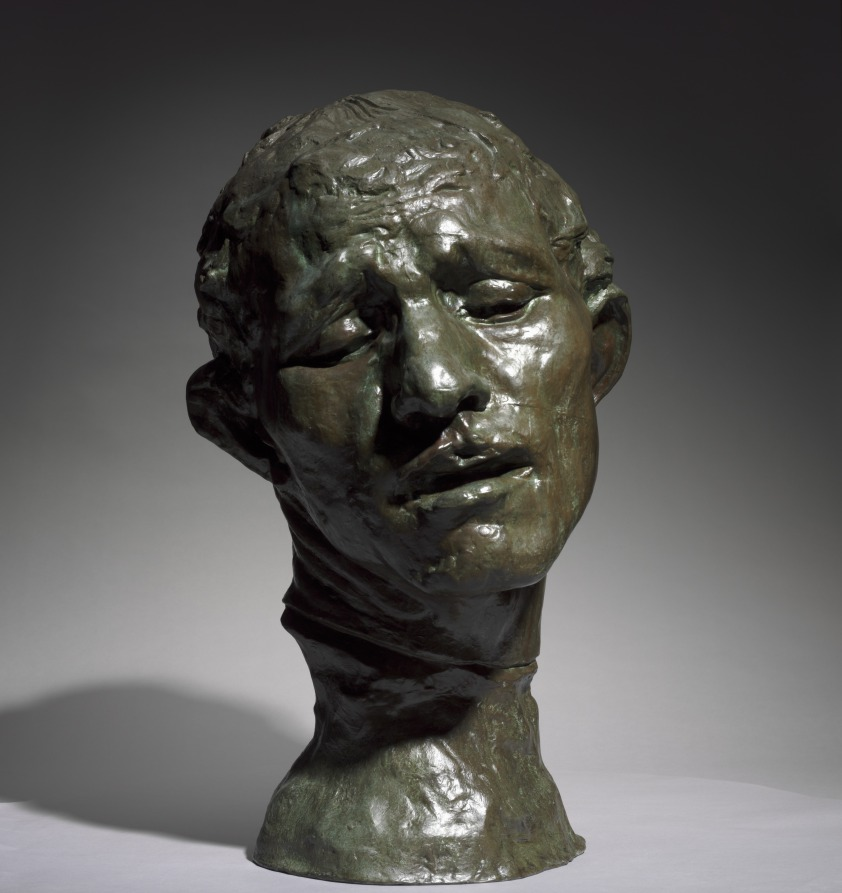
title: Heroic Head of Pierre de Wissant, One of the Burghers of Calais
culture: France, 19th century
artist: Auguste Rodin (French, 1840–1917)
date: 1886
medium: bronze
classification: Sculpture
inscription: inscribed at neck, left: A.Rodin; inscribed lower back: Alexis Rudier/Fondeur-Paris.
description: This sculpture depicts one of the figures in Rodin’s large public monument The Burghers of Calais (1884–89), featuring six French men who volunteered to be taken prisoner by the English in exchange for lifting the siege of Calais during the Hundred Years War (1337–1453). Pierre de Wissant’s anguished expression suggests extreme mental suffering as he contemplates his expected execution. Rodin exhibited a life-size version of the figure as an independent work before completing the monument. He later made multiple versions in various sizes and media.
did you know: This sculpture depicts the head of a figure from Rodin's large public monument The Burghers of Calais (1884-89). The CMA also owns a plaster version of the head.